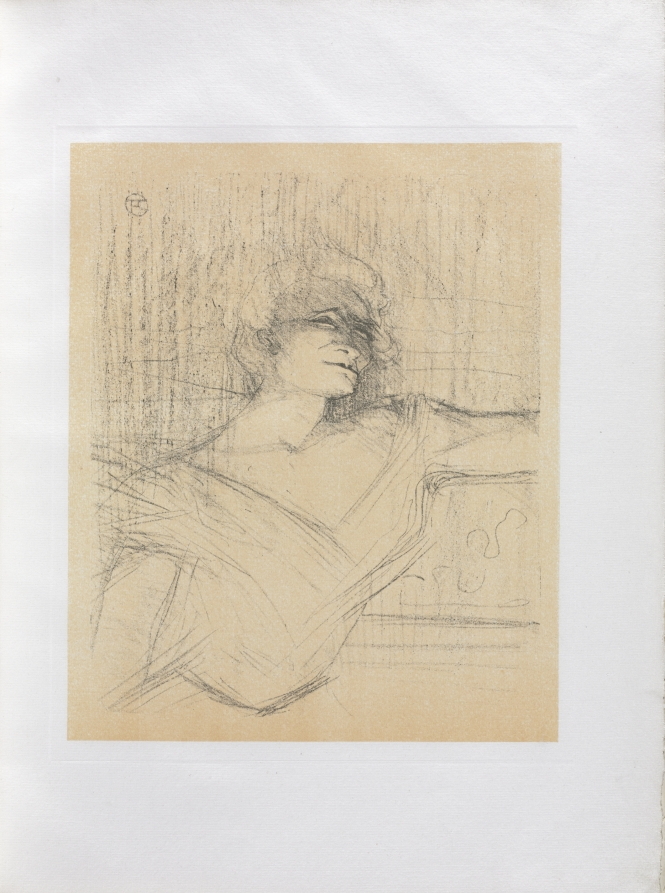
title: Yvette Guilbert-English Series: Dans la glu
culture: France, 19th century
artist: Henri de Toulouse-Lautrec (French, 1864–1901)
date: 1898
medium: lithograph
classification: Bound Volume